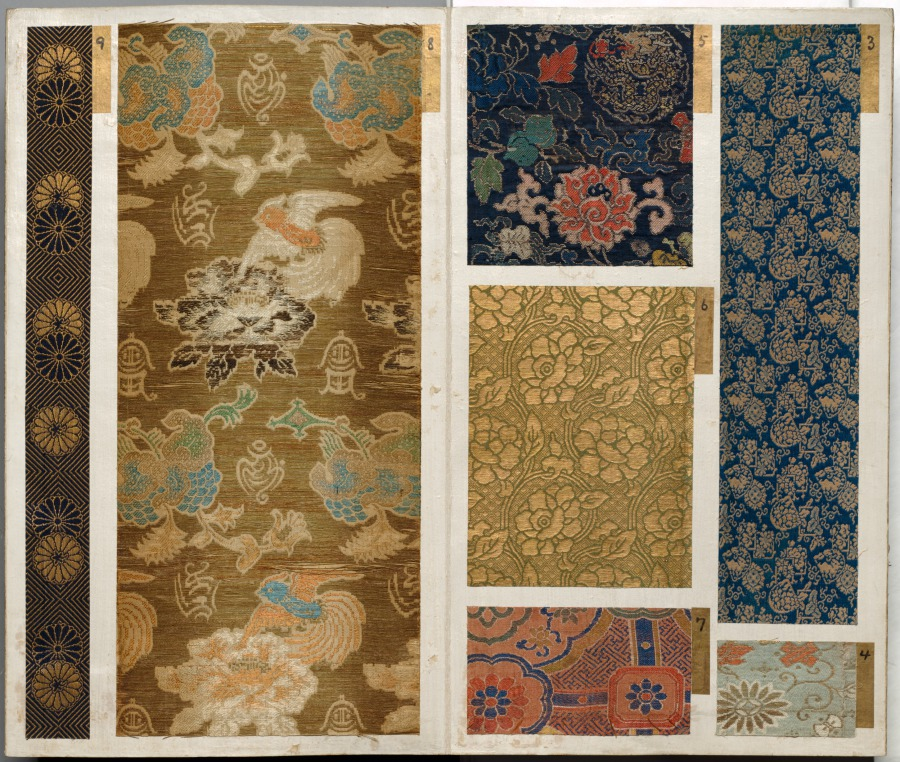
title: Album of Textile Samples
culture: Japan, Edo period (1615–1868)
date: 1600s-1700s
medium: silk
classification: Textile